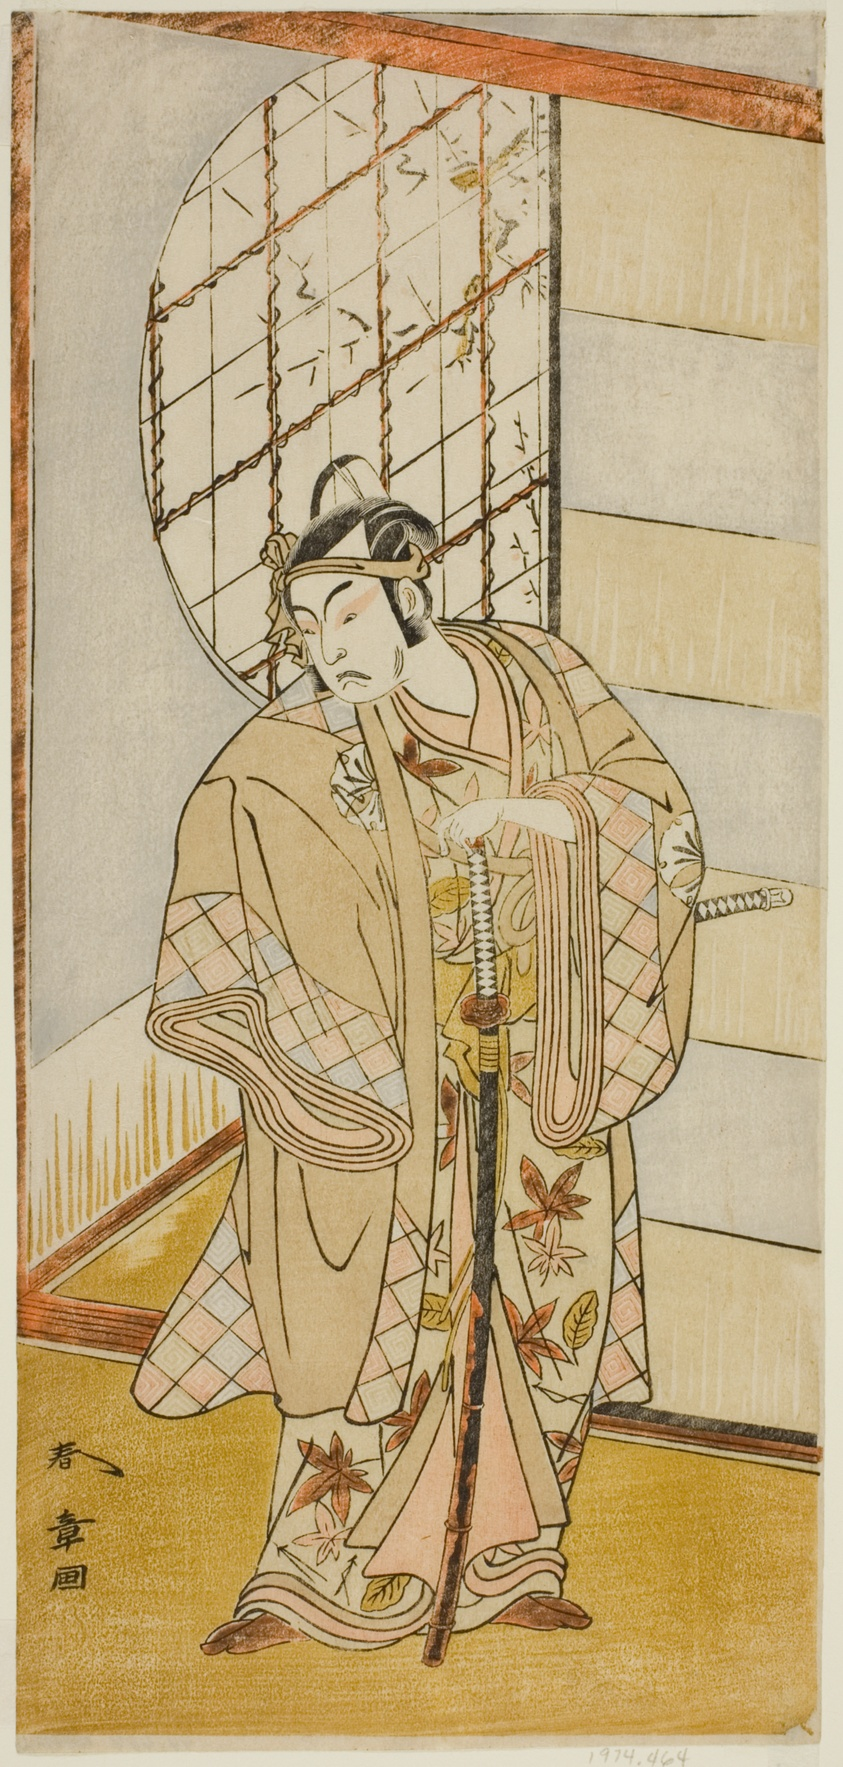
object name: Print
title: The Actor Matsumoto Koshiro IV as Matsuo-maru in the Play Sugawara Denju Tenarai Kagami, Performed at the Nakamura Theater in the Ninth Month, 1773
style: Japanese (culture or style)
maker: Katsukawa Shunsho 勝川 春章; Japanese, 1726-1792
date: c. 1773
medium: Color woodblock print; hosoban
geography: Japan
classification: woodblock print; print; asian art